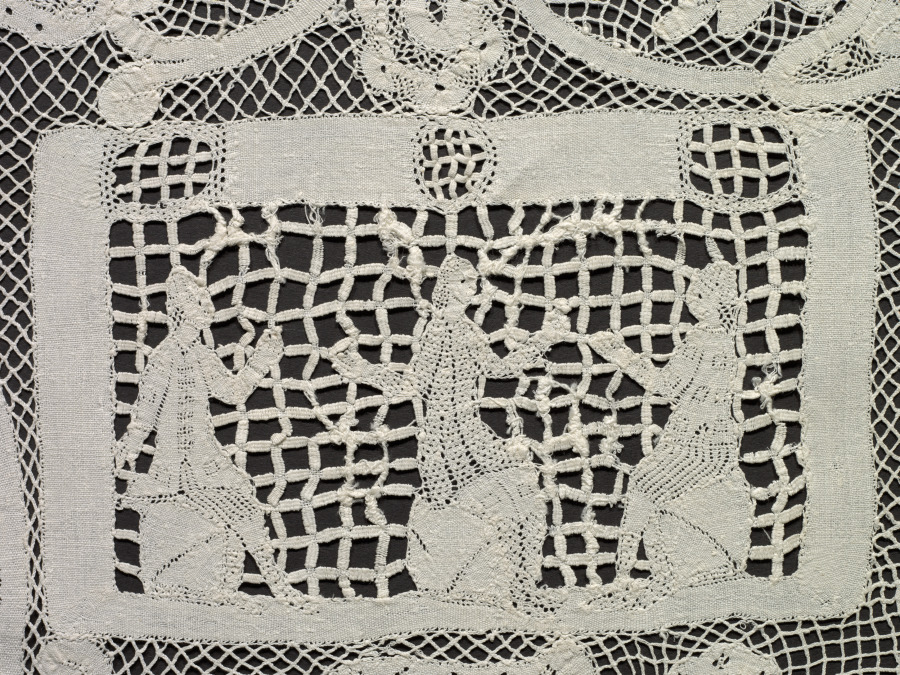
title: Lace Flounce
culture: Italy, Milan(?)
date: 1750–99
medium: Linen: bobbin lace (Punto di Milano)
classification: Lace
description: Being the most prestigious material, lace was used extensively by the 1600s for altar linen and for trimming priest’s albs, often incorporating finely rendered religious images amid blossoming vines. This alb flounce depicts scenes from the Old Testament story of Joseph, whose jealous brothers sold him to a caravan bound for Egypt. Joseph later interpreted dreams of the pharaoh, who made him ruler. When famine in Canaan caused Joseph’s ten brothers to travel to Egypt in search of food, they bowed down to him. After he revealed his identity, he forgave his brothers and God saved the family.